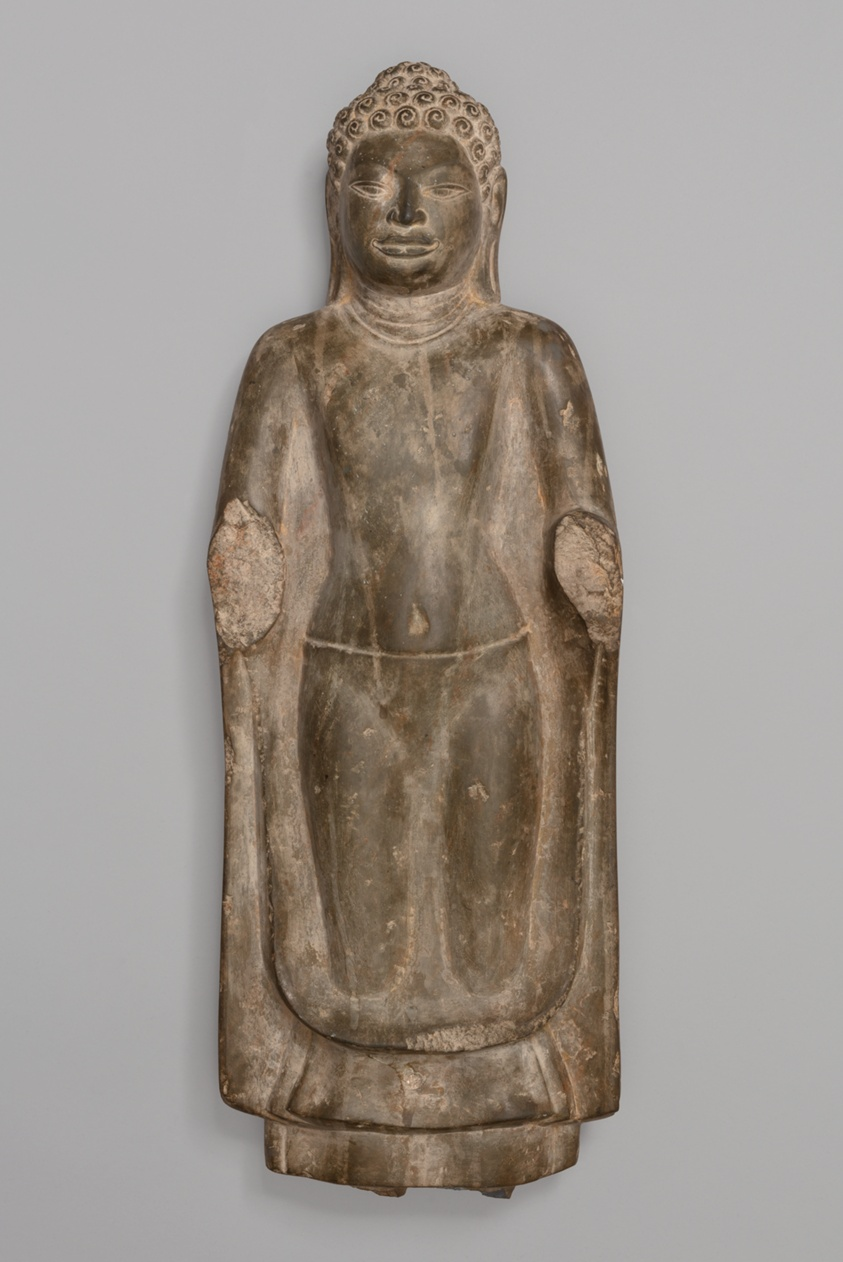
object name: Sculpture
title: Standing Buddha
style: Southeast Asian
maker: Central Thailand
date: Mon period, 8th‒9th century or later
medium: Limestone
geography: Thailand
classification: sandstone; stone; sculpture; asian art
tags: Buddha